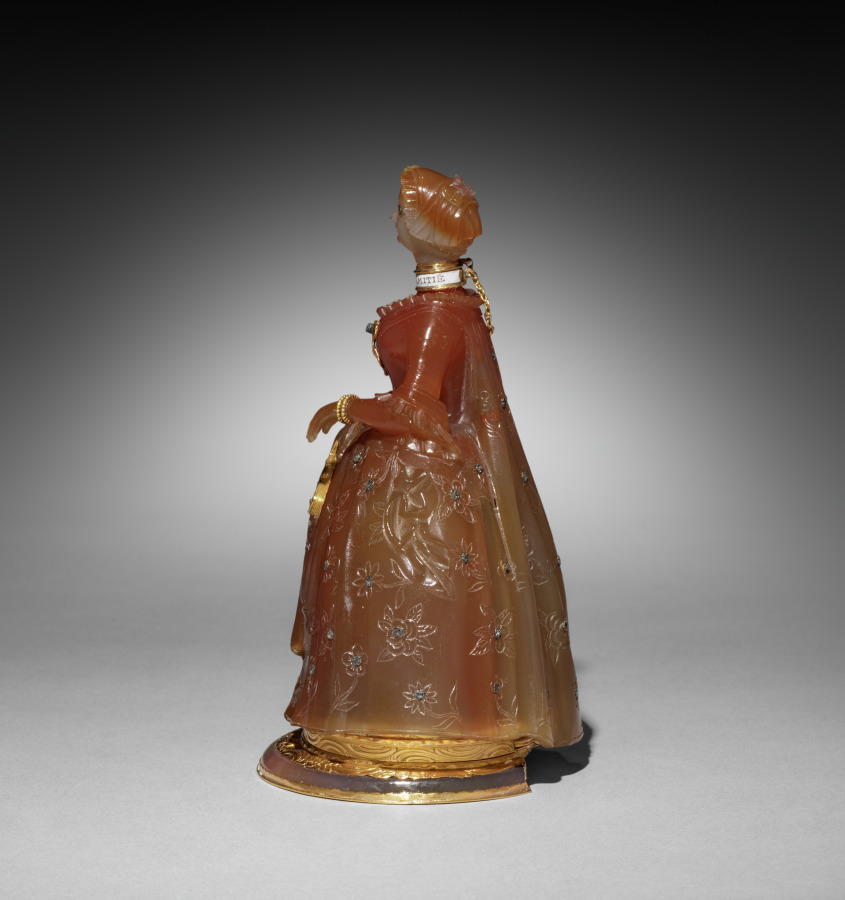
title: Scent Bottle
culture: England, 18th century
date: c. 1770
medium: chalcedony mounted in gold decorated with diamonds and enamel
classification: Miscellaneous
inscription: on neck collar: Gage d'amitie.